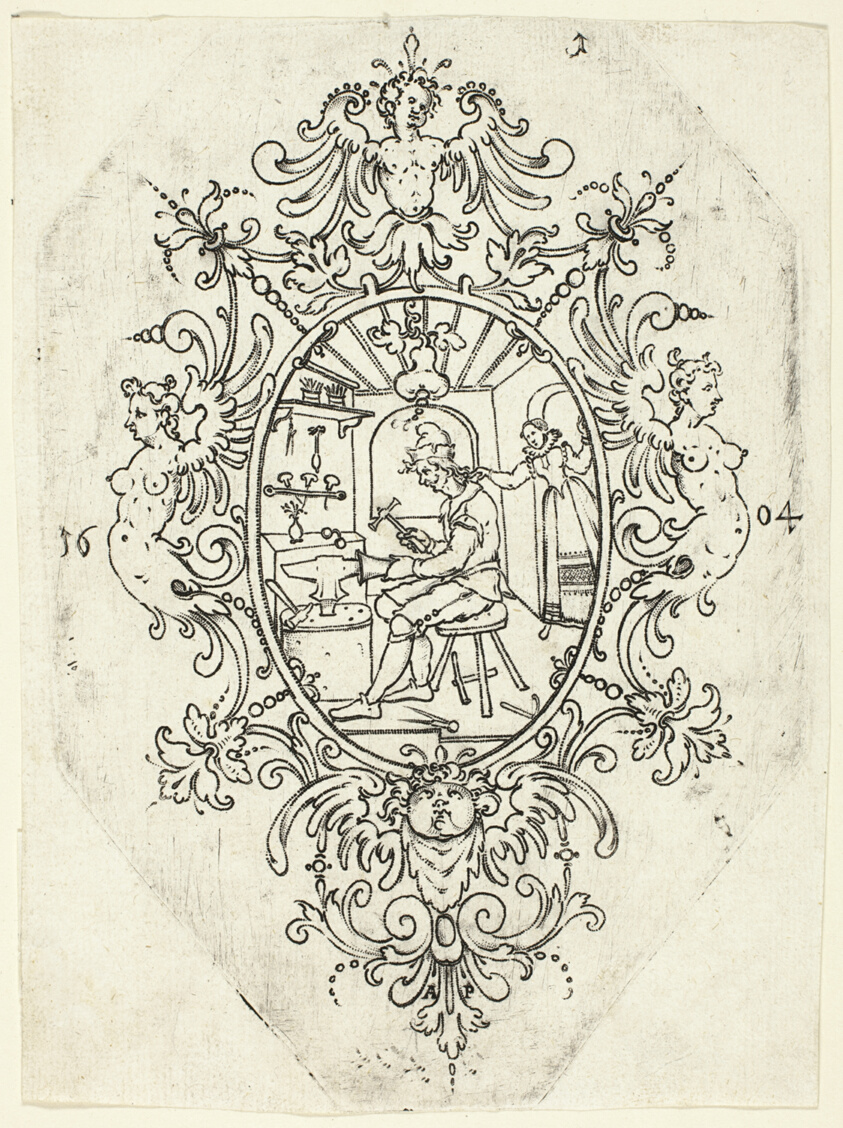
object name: Print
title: Plate 1, from twenty ornamental designs for goblets and beakers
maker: Master A.P. (German, active early 17th century)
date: 1604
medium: Punch engraving in black on ivory laid paper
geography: Germany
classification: engraving; print; prints and drawing